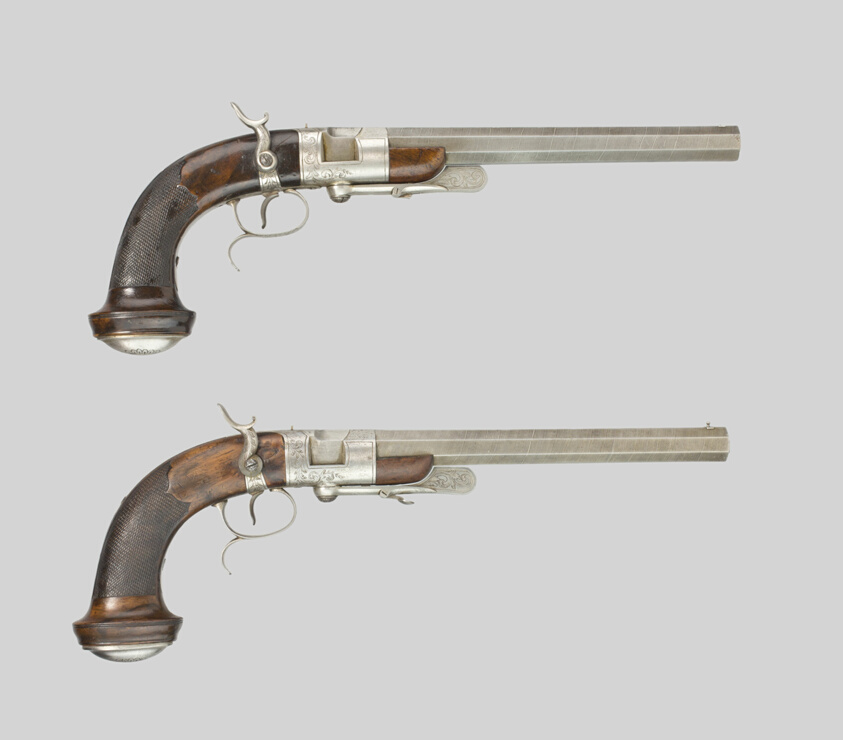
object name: Arms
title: Pair of Breechloading Percussion Rifled Dueling Pistols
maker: Beatus Beringer; French, Paris and Saint-Etienne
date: c. 1850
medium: Walnut and steel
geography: Paris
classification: firearm-handgun; arms; arms and armor